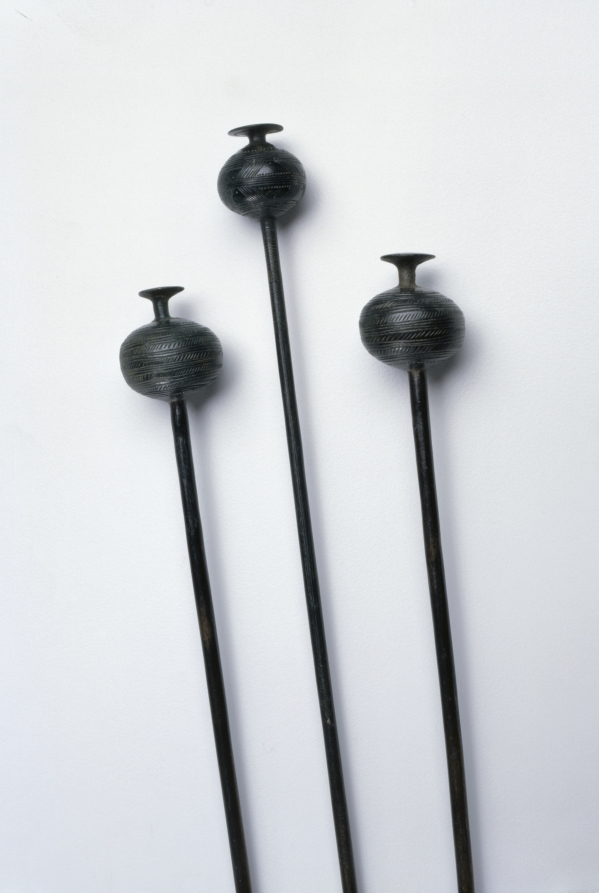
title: Garment Pin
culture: possibly Hungary, Bronze Age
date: c. 1400 BCE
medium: cast and wrought bronze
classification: Jewelry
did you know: This metal pin was used to fasten clothing.